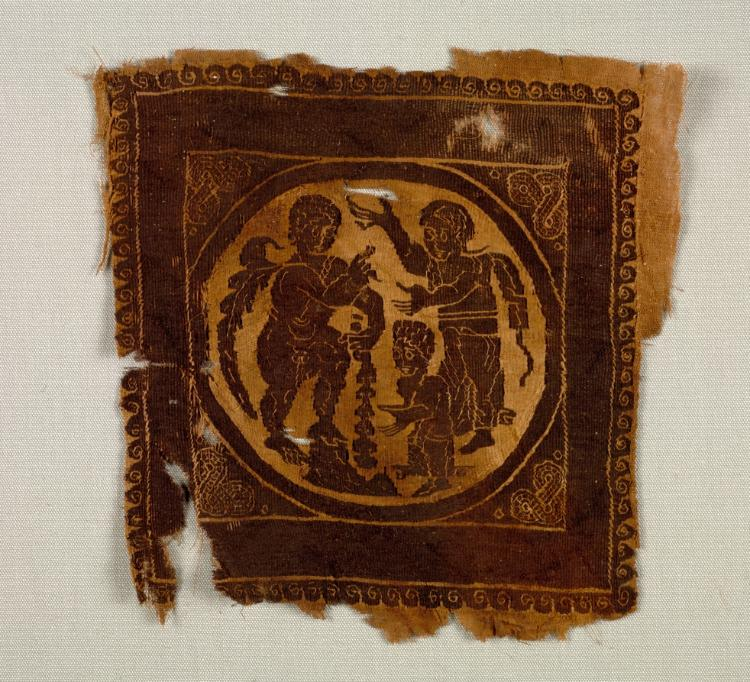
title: Ornamental Square from a Tunic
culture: Egypt, Byzantine period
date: 400s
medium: tapestry weave with supplementary weft wrapping; undyed linen and dyed wool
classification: Textile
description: This mythological scene of the first labor of Hercules––capturing the Nemean lion––originally decorated the front, back, or shoulder of a unisex linen tunic. Hercules was tasked with performing 12 labors as penance for slaying his own wife and children. Here he carries a club with a lion skin slung over his shoulder, serving as impenetrable armor. His companion, Iolaus, carries his bow and quiver on the right. The small figure in the center is unidentified. Knotted ornaments fill the corners, surrounded by a broad purple border edged with a running wave motif.